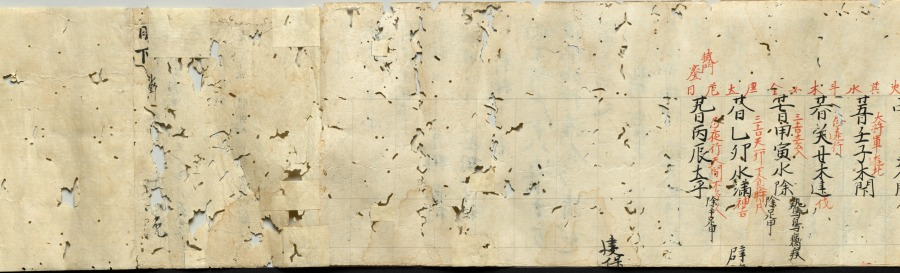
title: Scroll of Miscellaneous Notes written on a Calendar by Priest Seigen (verso)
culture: Japan, Kamakura period (1185–1333)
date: c. 1200–1231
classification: Manuscript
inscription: bears miscellaneous notes written by Priest Seigen.